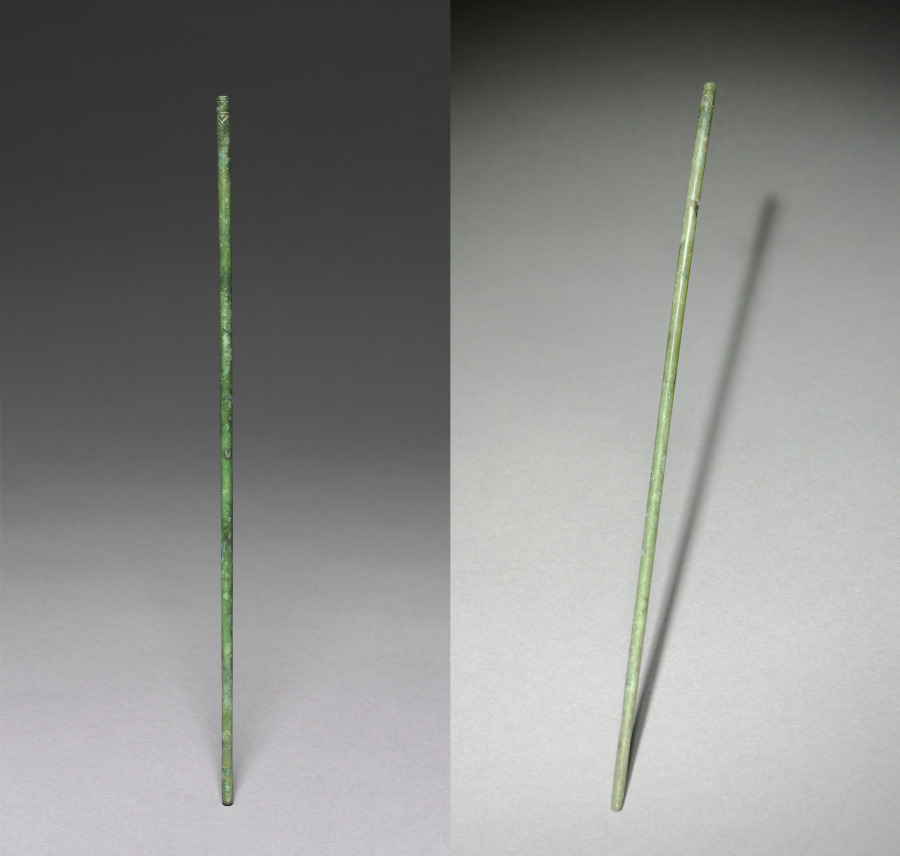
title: A Pair of Chopsticks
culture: Korea, Goryeo dynasty (918–1392)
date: 918–1392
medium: bronze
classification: Metalwork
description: In Korea, chopsticks made of metal such as brass, silver, and gold were excavated from ancient tombs and ruins dated to the 6th century at the earliest. Burial goods often include utilitarian objects such as table wares and utensils because the dead were believed to need them in the afterlife.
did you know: Nowadays Korean still prefer metal chopsticks (stainless steel and brass) to wooden ones.